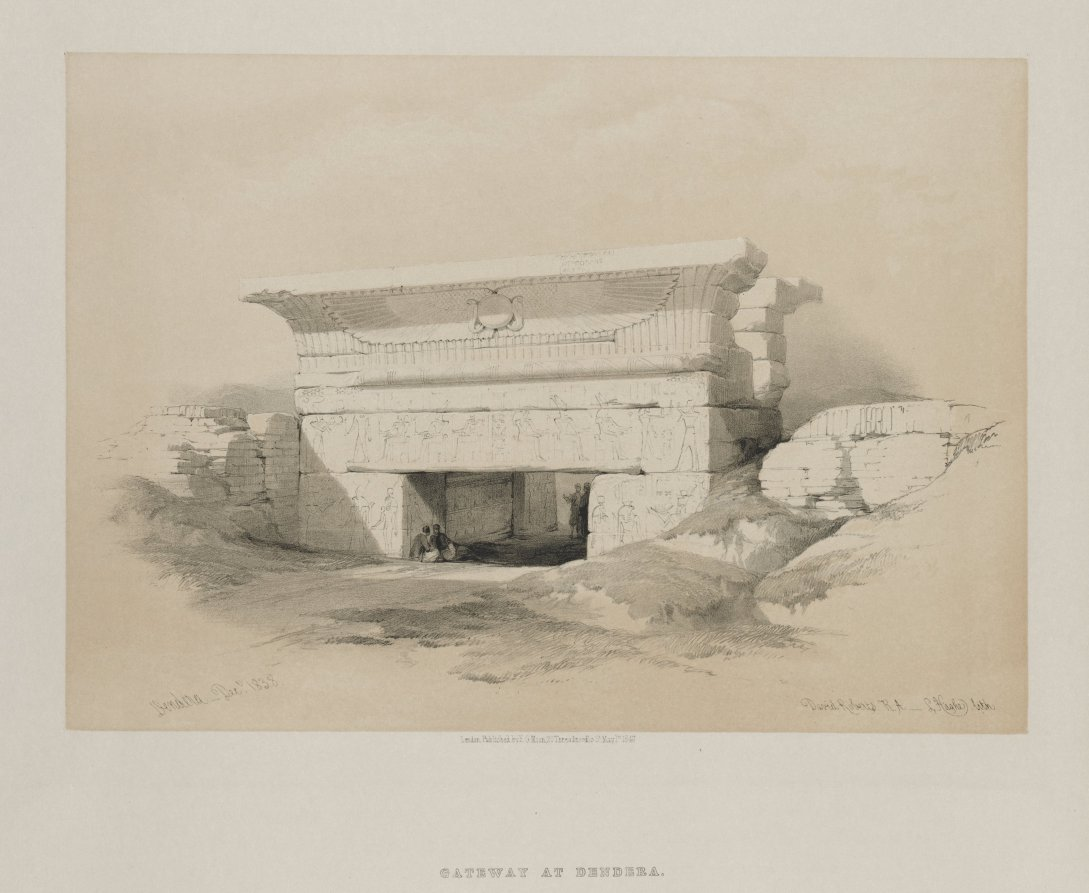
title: Egypt and Nubia, Volume I: Dendera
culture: England, 19th century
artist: Louis Haghe (British, 1806–1885)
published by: F. G. Moon, 20 Threadneedle Street, London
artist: after David Roberts (Scottish, 1796–1864)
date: 1847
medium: color lithograph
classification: Print